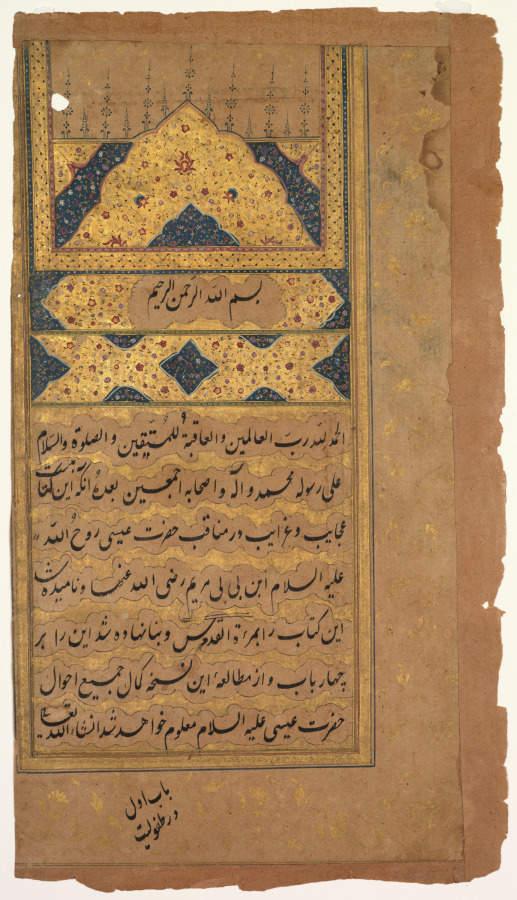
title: Illuminated opening page (folio 1 verso) and 131 folios with Persian text, from a Mirror of Holiness (Mir’at al-quds) of Father Jerome Xavier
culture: Mughal India, Allahabad, made for Prince Salim (1569–1627)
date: 1602–4; margins added with rebinding, about 1900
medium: Gum tempera, ink, and gold on paper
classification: Manuscript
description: The opening page of this Christian manuscript is ornamented in the manner of books made for elite Islamic patrons. Using costly pigments made from the semiprecious blue stone called lapis lazuli and gold paint, the artists created contrasting ground colors to set off delicate floral arabesques that evoke the waters and light of paradise. The text was written in Persian, the official court language of the Mughal rulers in India, and read from right to left. Father Jerome had studied Persian in India for seven to eight years before Akbar asked him to produce a history of the life of Jesus in Persian.